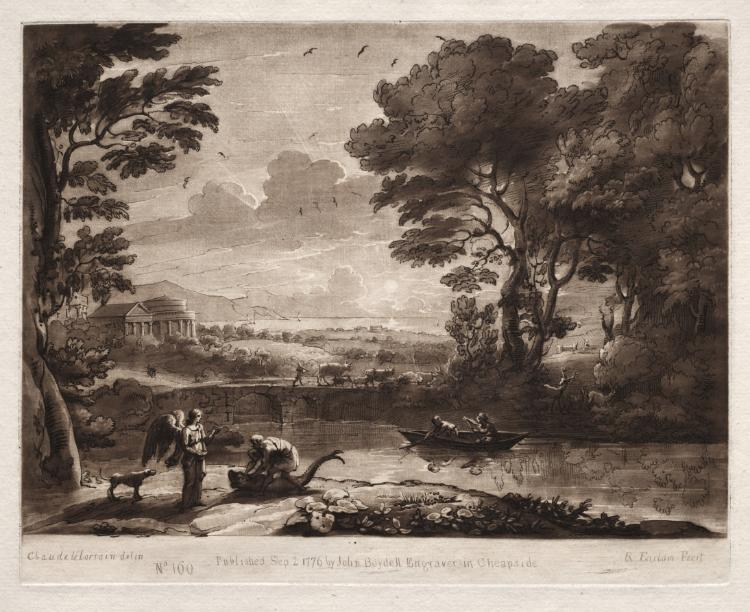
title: Liber Veritatis: No. 160, Tobias and the Angel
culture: England, 18th century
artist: Richard Earlom (British, 1743–1822)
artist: after Claude Lorrain (French, 1604–1682)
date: 1774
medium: etching and mezzotint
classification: Print